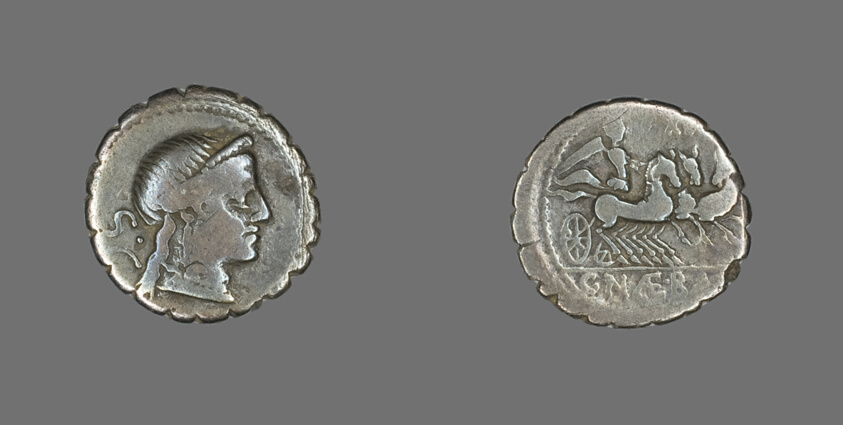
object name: Coin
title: Denarius Serratus (Coin) Depicting the Goddess Venus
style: roman (ancient, style or period), ancient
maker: Roman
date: about 79 BCE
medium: Silver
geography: Roman Empire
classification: coin; ancient art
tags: Chariots